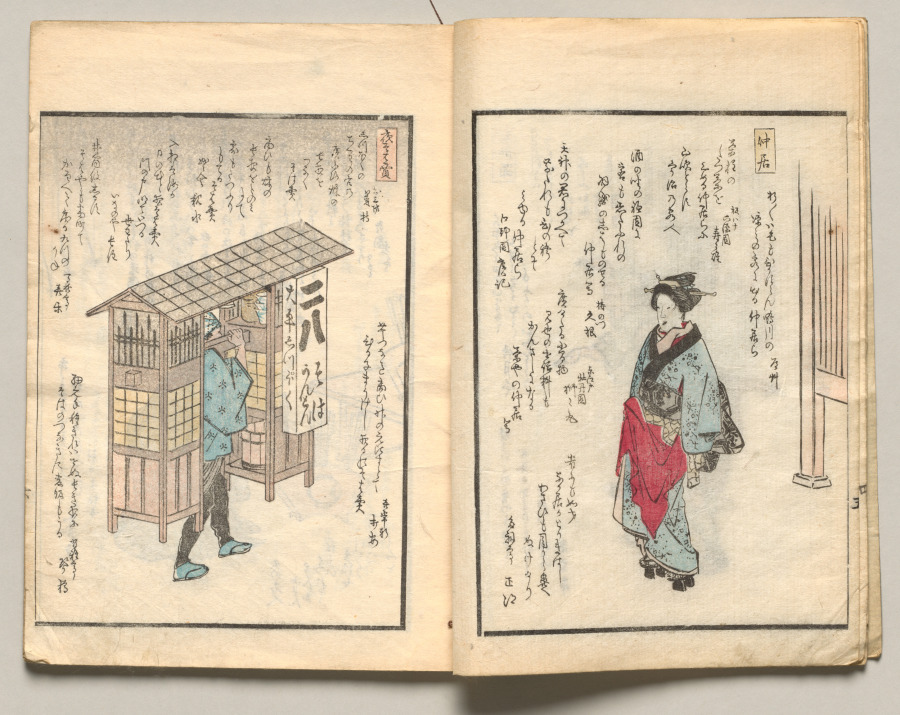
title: Spread Six from Volume Four of People of Japan in Light Verse (Kyōka)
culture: Japan, Edo period (1615–1868)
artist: Utagawa Hiroshige (Japanese, 1797–1858)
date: 1857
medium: Woodblock-printed book; ink and color on paper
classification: Bound Volume